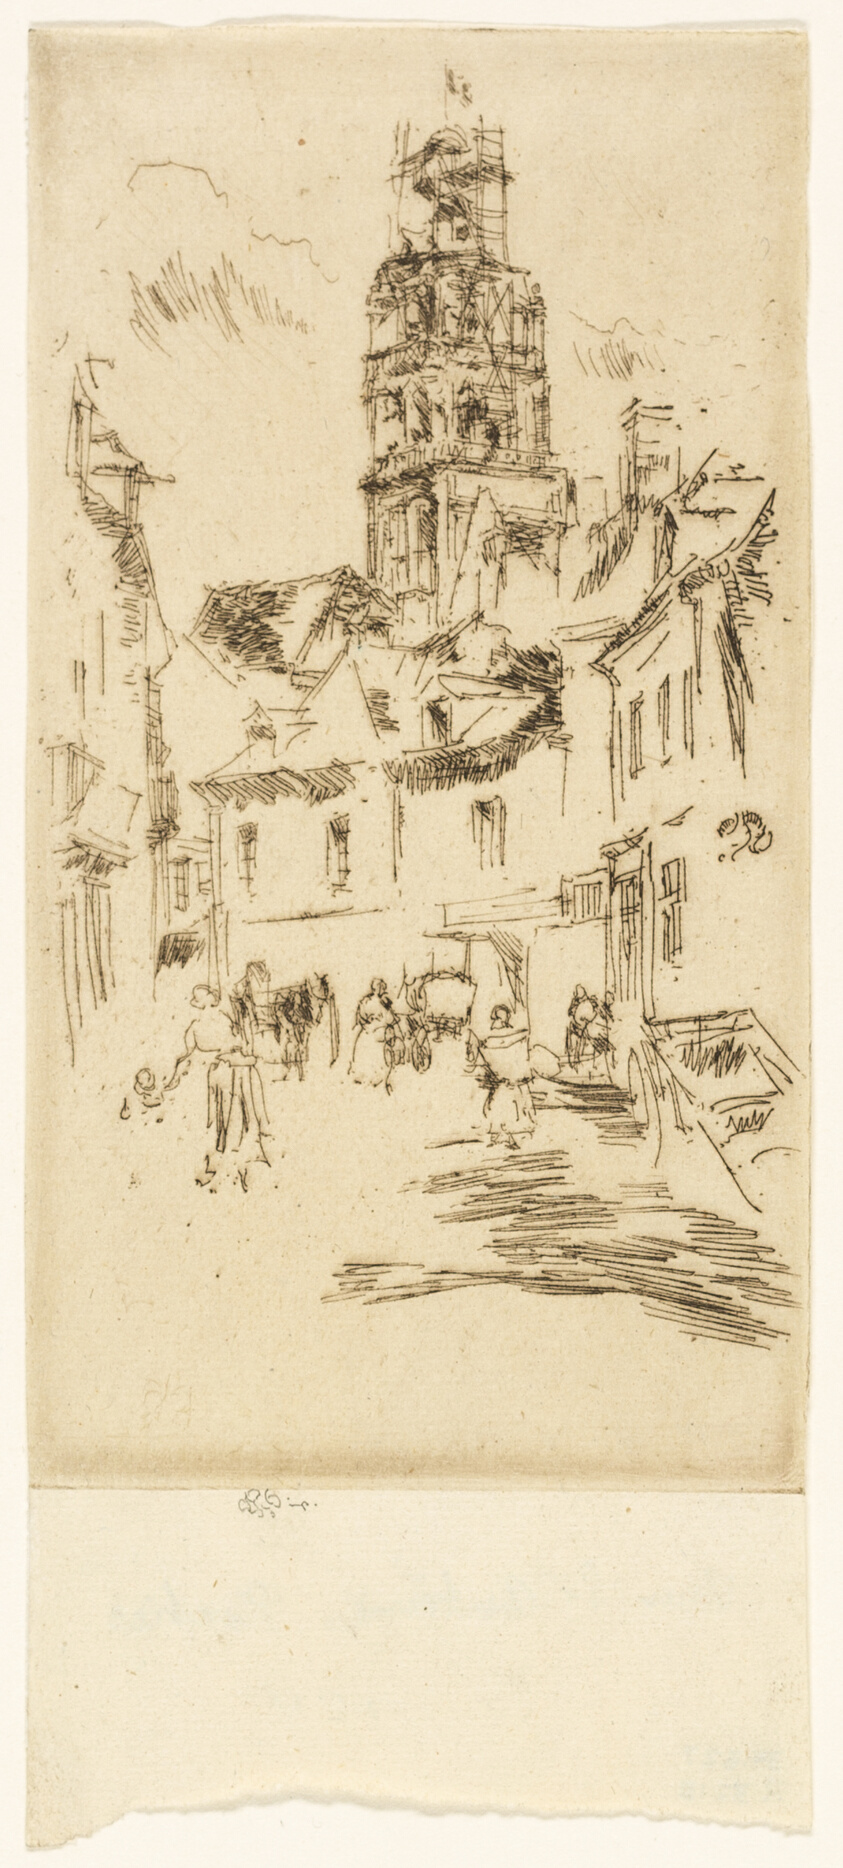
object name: Print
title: Tour Saint Antoine, Loches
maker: James McNeill Whistler (American, 1834-1903)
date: 1888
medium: Etching with foul biting in dark brown ink on cream laid paper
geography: United States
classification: etching; foul biting; print; prints and drawing; paper